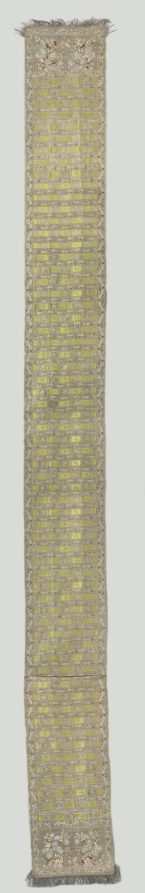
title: Sash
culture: Poland, 18th century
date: 18th century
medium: brocade; silk and metal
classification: Textile